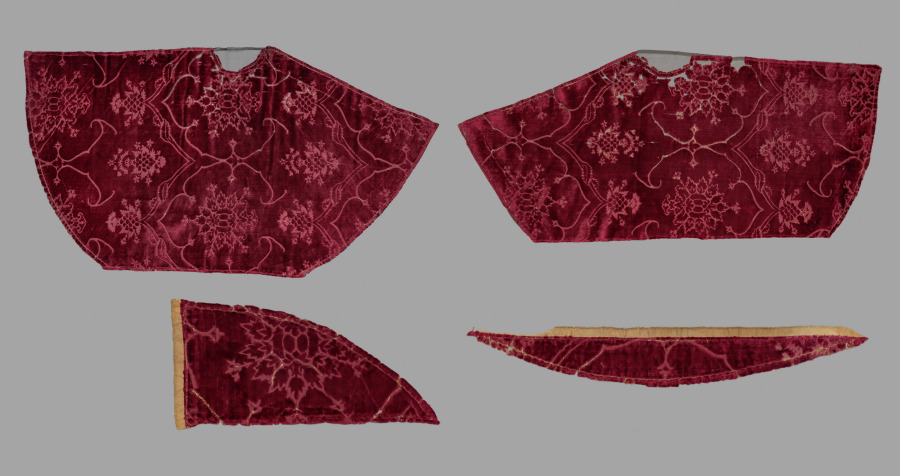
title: Pieces from Disassembled Cape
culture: Italy, 15th century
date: 1400s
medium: velvet (cut and voided); silk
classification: Velvet